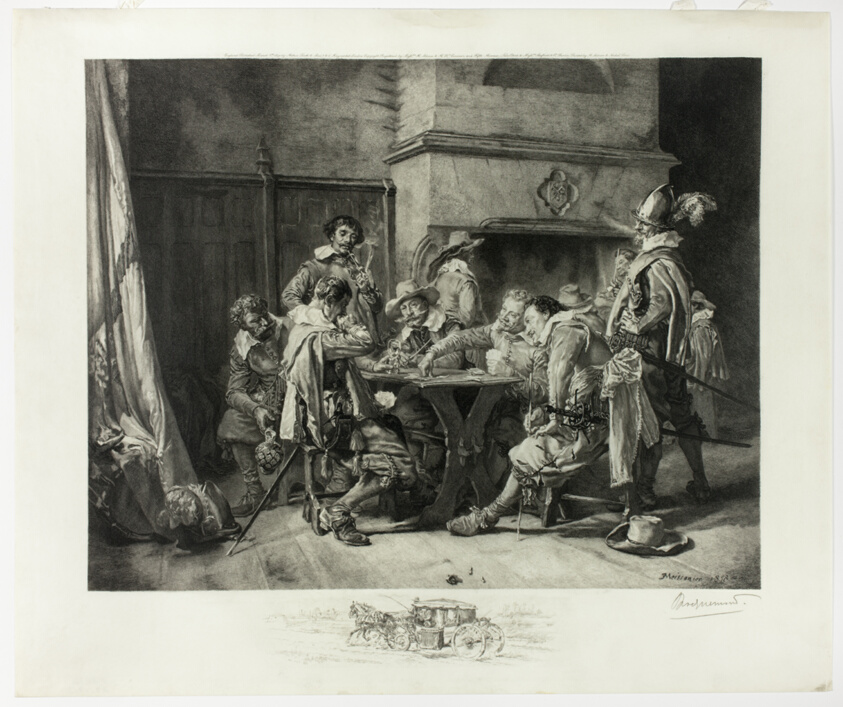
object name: Print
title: Partie perdue (Soldiers Playing Cards)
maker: Félix Bracquemond (French, 1833-1914); after Jean Louis Ernrest Meissonier (French, 1815-1891)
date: 1898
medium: Etching, with engraving, on parchment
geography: France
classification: intaglio; print; prints and drawing